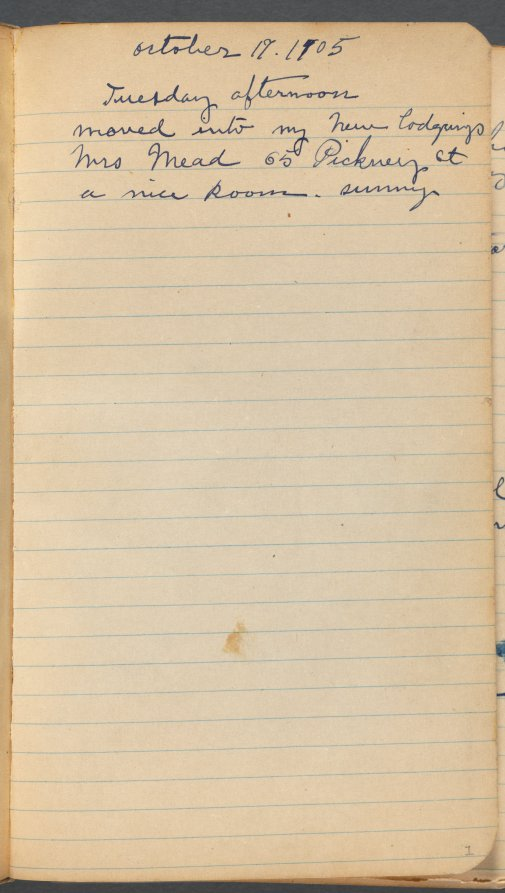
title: Sketchbook, page 001: Notes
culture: America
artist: Maurice Prendergast (American, born Newfoundland [now Canada], 1858–1924)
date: 1905–10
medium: graphite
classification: Bound Volume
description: This sketchbook contains 69 pages of drawings, a diary largely devoted to the state of the artist's health, and a three-page discourse on the nature of genius and ideas.